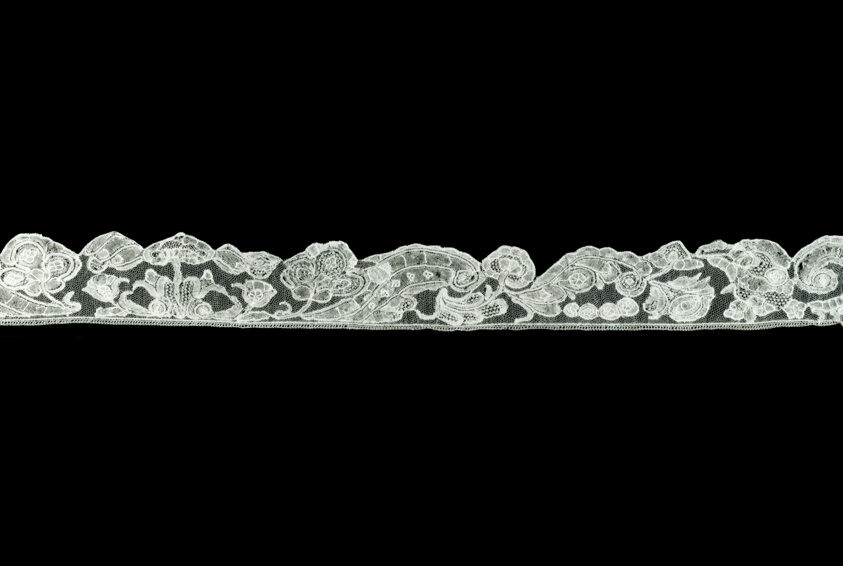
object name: Textile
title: Border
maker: England, West Country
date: 1725/75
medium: Linen, bobbin part lace of a type known as "Brussels"; regrounded with cotton needle made mesh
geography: England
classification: textile; lace - bobbin